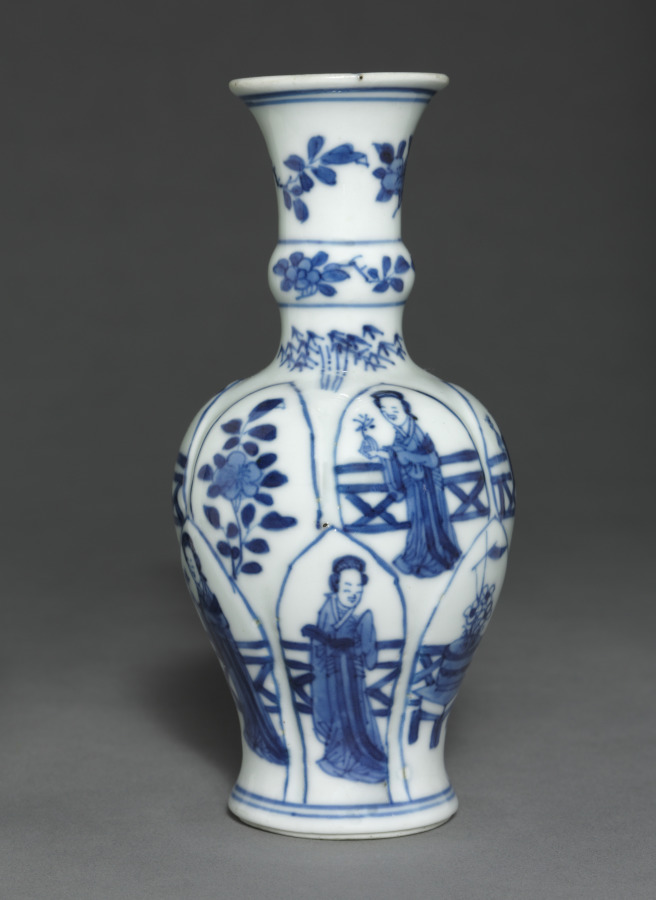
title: Vase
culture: China, Qing dynasty (1644-1911)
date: 19th Century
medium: porcelain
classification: Ceramic